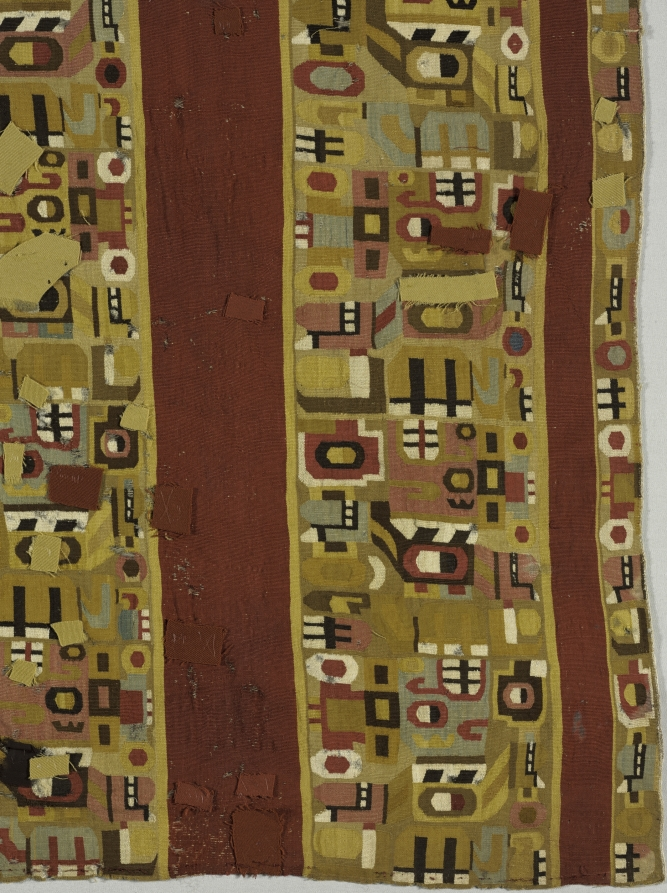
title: Tunic with Sacrificer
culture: South America, Peru, Central Andes, Middle Horizon, Wari people, 7th-11th century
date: 600–1000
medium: camelid-fiber, cotton; tapestry weave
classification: Textile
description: An extremely abstract supernatural sacrifice repeats in different colors and orientations across the body of this tunic, which was shortened on one side in antiquity. Look for the toothy black-and-white mouth in the sacrificer's upward-gazing head; other facial features include a button nose and a vertically divided eye. The figure holds the L-shaped haft of an axe behind its back and, at the front of its body, a short staff with a severed, upside-down human head on the top.